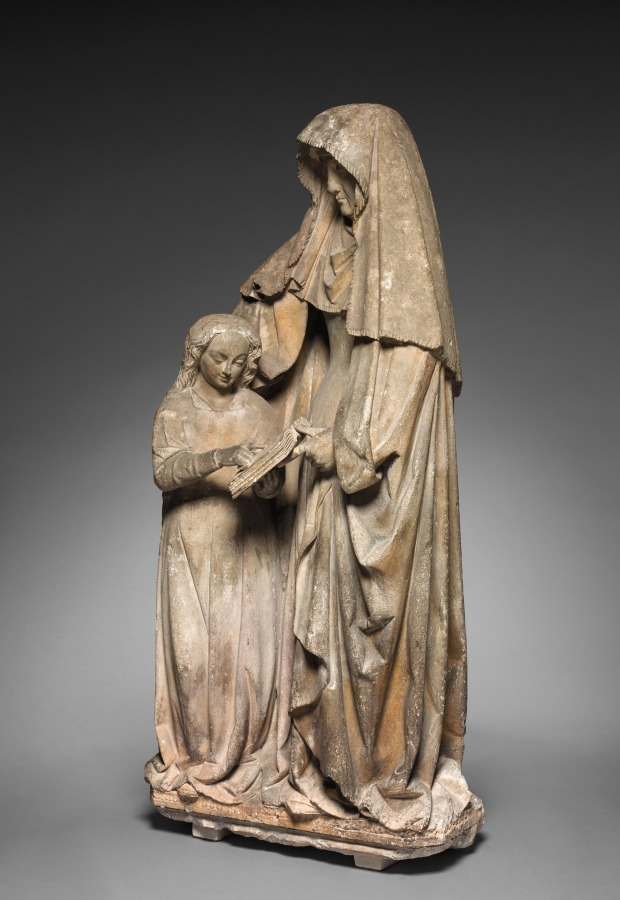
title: Education of the Virgin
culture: France, Bourbonnais, 16th century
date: c. 1500–1510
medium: limestone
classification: Sculpture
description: This relief depicts the young Virgin Mary learning to read at the knee of her mother Anne.